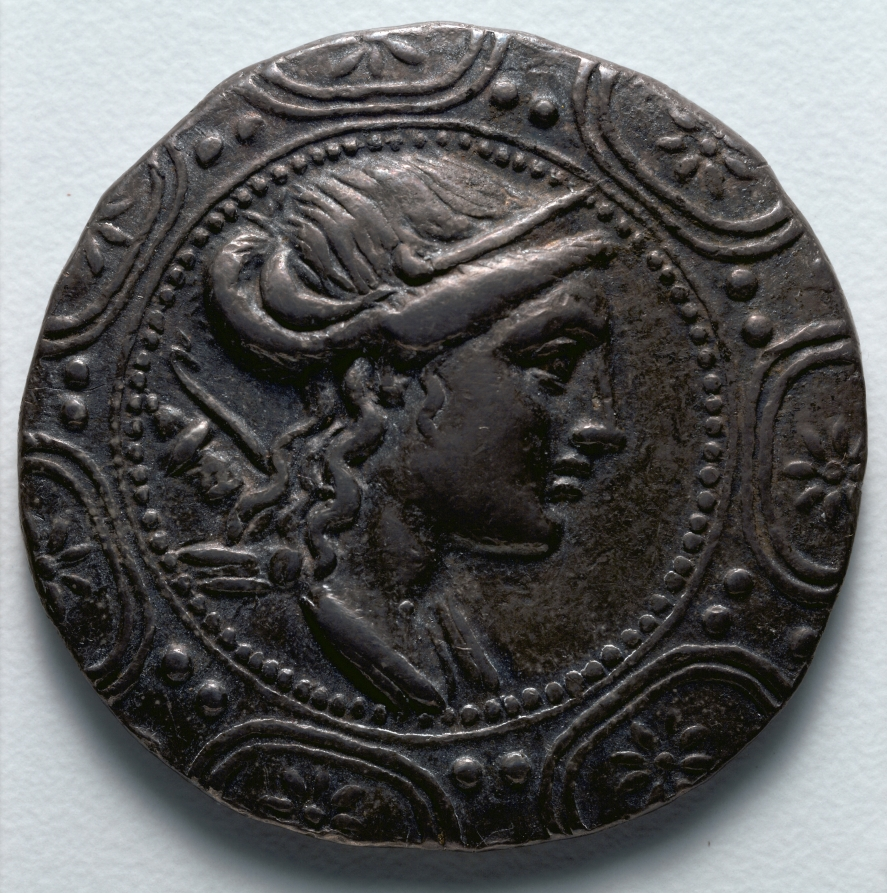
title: Tetradrachm: Macedonian Shield with Head of Artemis (obverse)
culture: Greek, Macedonian, minted at Amphipolis (Macedonia), under Roman control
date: 158–150 BCE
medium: silver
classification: Coins